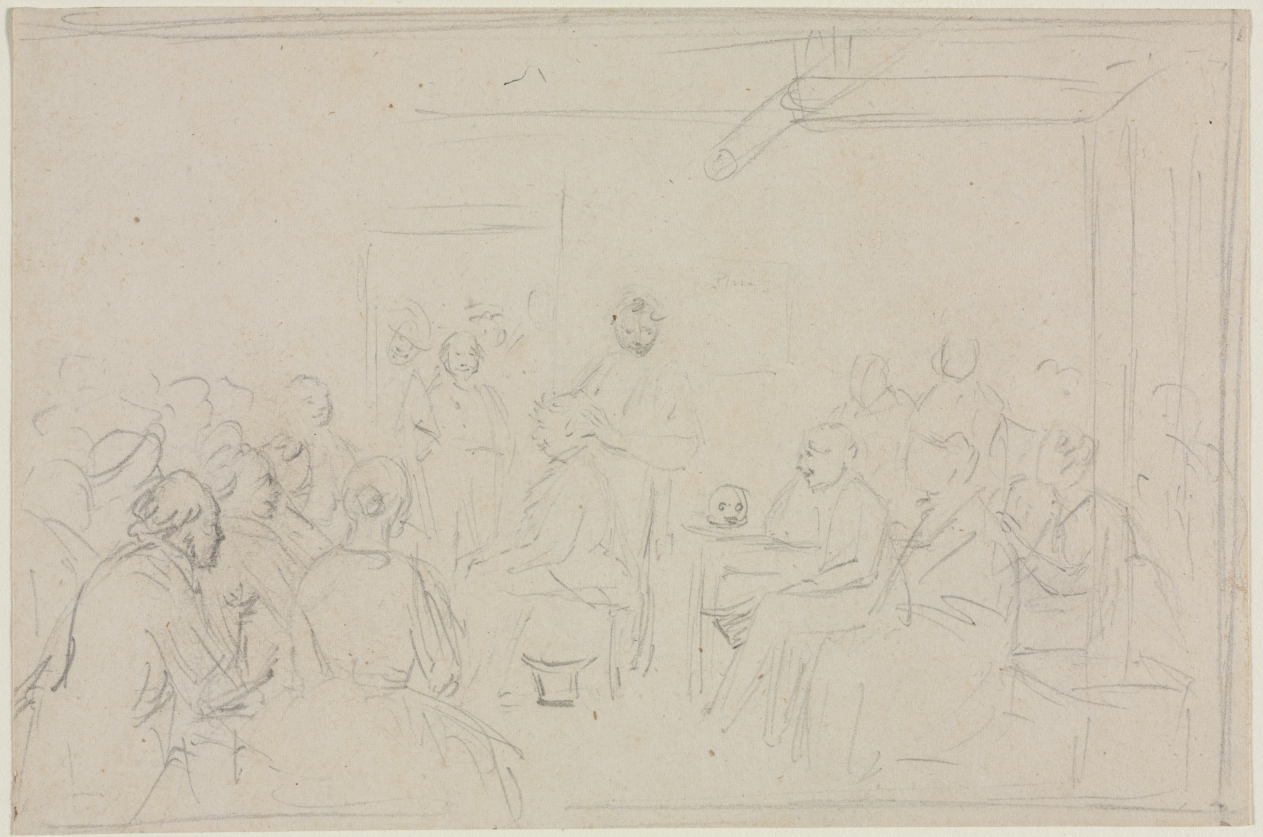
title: The Phrenologist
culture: America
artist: William Sidney Mount (American, 1807–1868)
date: c. 1827–68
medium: graphite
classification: Drawing